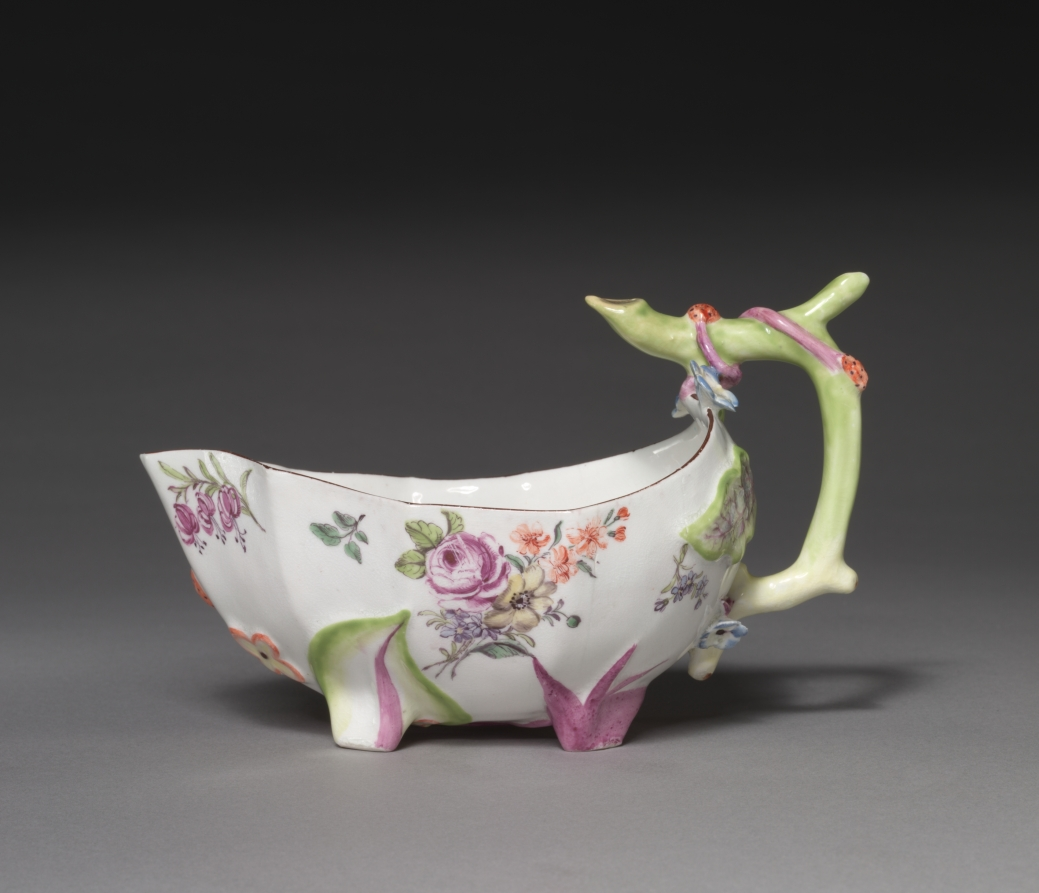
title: Sauceboat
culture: England, Chelsea, 18th century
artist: Chelsea Porcelain Factory (Britain, London, 1745–84)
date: c. 1755–1756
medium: porcelain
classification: Ceramic